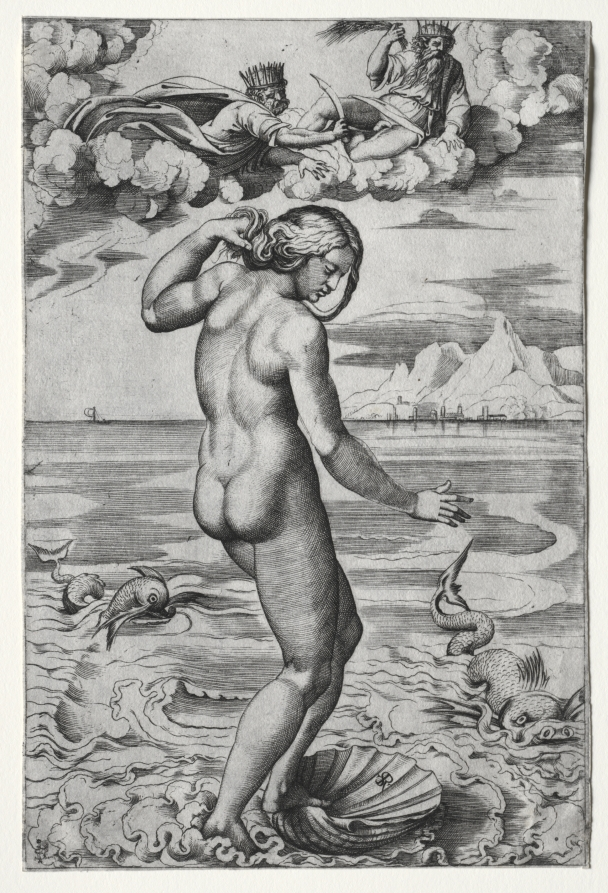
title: The Birth of Venus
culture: Italy, 16th century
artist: Marco Dente (Italian, c. 1486–1527)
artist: after Raphael (Italian, 1483–1520)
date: c. 1516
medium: engraving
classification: Print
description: Marco Dente was one of several printmakers who re-created Raphael’s designs as engravings. Both of Dente’s compositions after Raphael relate to the latter’s frescos in the stufetta, or bathroom, of Cardinal Bernardo Dovizi da Bibbiena’s apartments in the Vatican Palace. A scholar of classical antiquity and a patron of the arts, the Cardinal personally chose these mildly erotic female nudes, a common subject in bathroom decorations, even for members of the clergy. Depicted here is Venus, the goddess of love and fertility. According to the myth of her birth, she was created in sea foam from the castrated genitals of the primeval sky god Uranus. In the clouds, Uranus’s son Saturn, the god of time, prepares to mutilate his father with a curved sword. Meanwhile, Venus steps out of frothy waves onto a seashell.